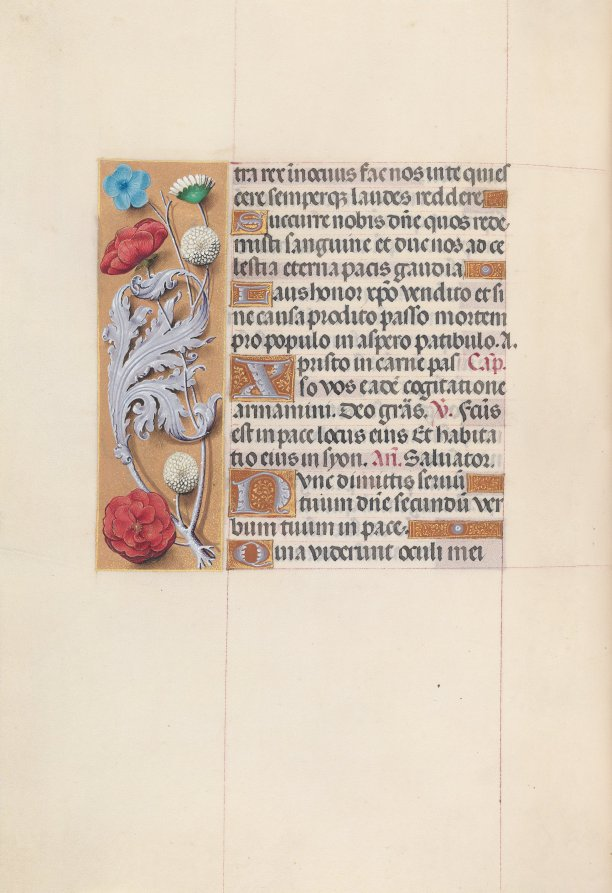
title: Hours of Queen Isabella the Catholic, Queen of Spain: Fol. 78v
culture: Flanders, Ghent and Bruges, late 15th century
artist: Master of the First Prayerbook of Maximillian (Flemish, c. 1444–1519)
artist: and Associates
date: c. 1500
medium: ink, tempera, and gold on vellum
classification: Bound Volume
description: This manuscript was illuminated by a circle of at least five highly organized manuscript painters active in the Flemish cities of Ghent and Bruges. The principal illuminator was Alexander Bening, who painted the majority of the book's miniatures. Manuscripts produced by this circle of artists are renowned for the decoration of their borders, which typically feature a rich variety of realistically-painted flowers, birds, and butterflies. This prayer book, called a book of hours, was intended not for a cleric, but for the private devotions of a lay person-in this case, Isabella the Catholic, Queen of Spain (1451-1504). Isabella's coat of arms embellishes the book's frontispiece. It is unlikely that the book was commissioned by the Queen herself; rather, she probably received it as a diplomatic gift from someone courting her patronage, perhaps Cardinal Francisco Jimenez de Cisneros. A Franciscan friar, Jimenez was dependent upon Isabella for his advancement, first to the post of Queen's confessor in 1492, and then to Archbishop of Toledo in 1495.